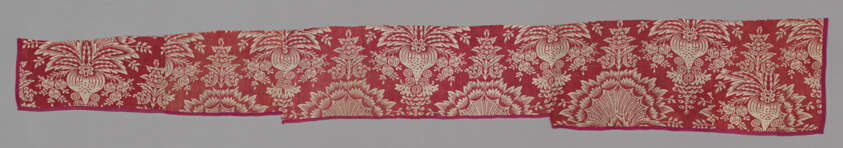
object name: Textile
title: Panel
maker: France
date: c. 1830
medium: Cotton, plain weave; block printed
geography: France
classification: textile; weaving - printed; printed textile